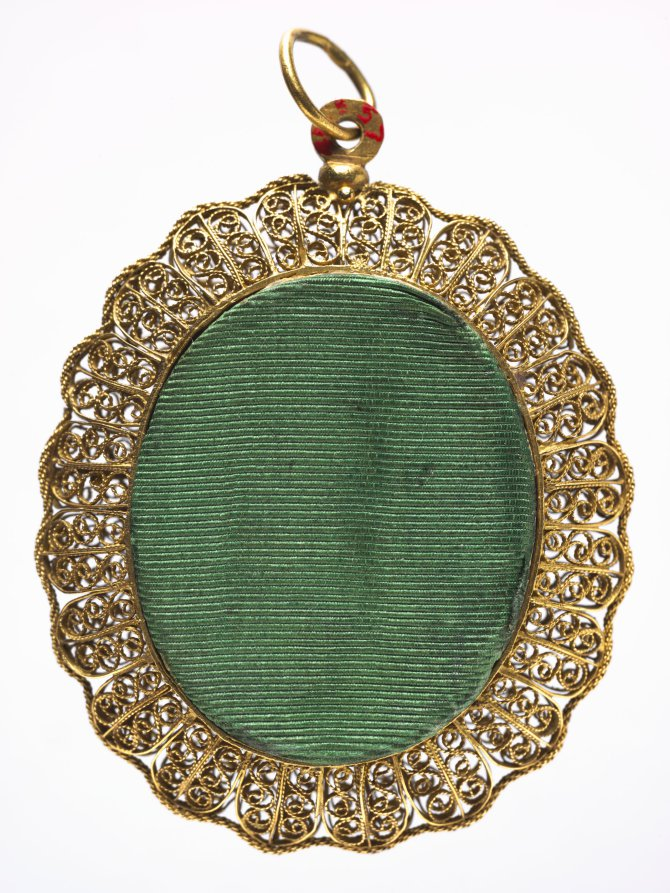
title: Portrait of a Man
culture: England, late 16th century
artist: Nicholas Hilliard (English, c. 1547–1619)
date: 1590s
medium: watercolor on vellum in a later gilt metal frame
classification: Portrait Miniature